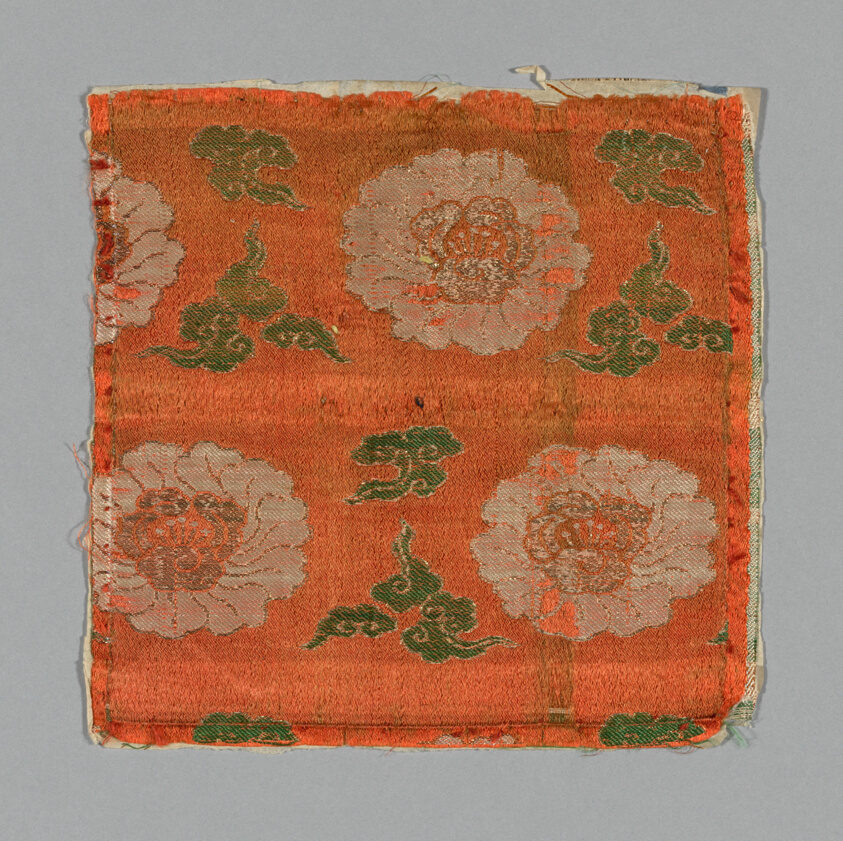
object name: Textile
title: Fragment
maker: China or Japan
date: 18th century, late Edo period (1789–1868)/ Meiji period (1868–1912)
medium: Silk, satin weave with supplementary wefts bound by secondary binding warps in twill interlacings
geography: China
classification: textile; weaving